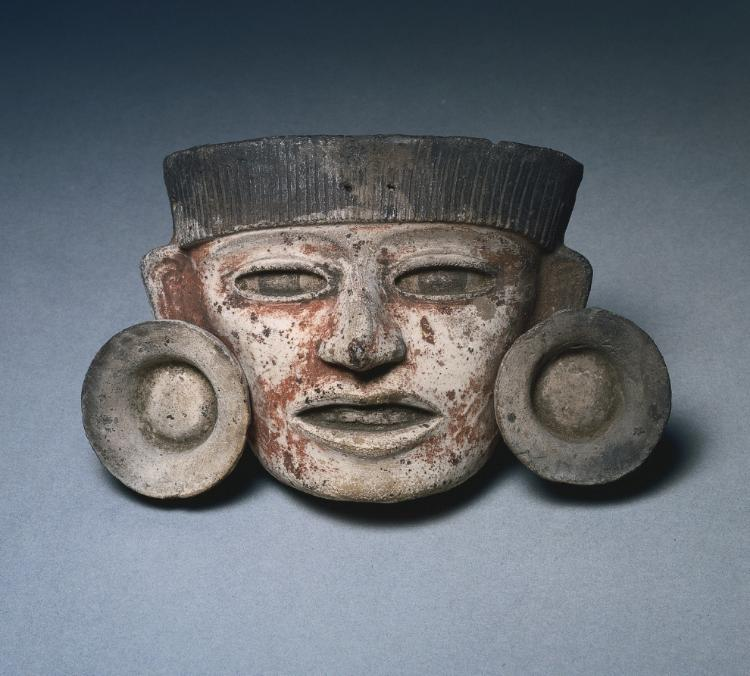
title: Mask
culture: Central Mexico, Teotihuacán, Classic period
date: 1–550 CE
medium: ceramic, slip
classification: Ceramic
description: Many Teotihuacán masks were once tied to something via holes on the back--perhaps a body-shaped form dressed in garments, ornaments, and a headdress that identified the figure. The stone masks’ eyes and mouths once held inlays representing irises, pupils, and teeth.